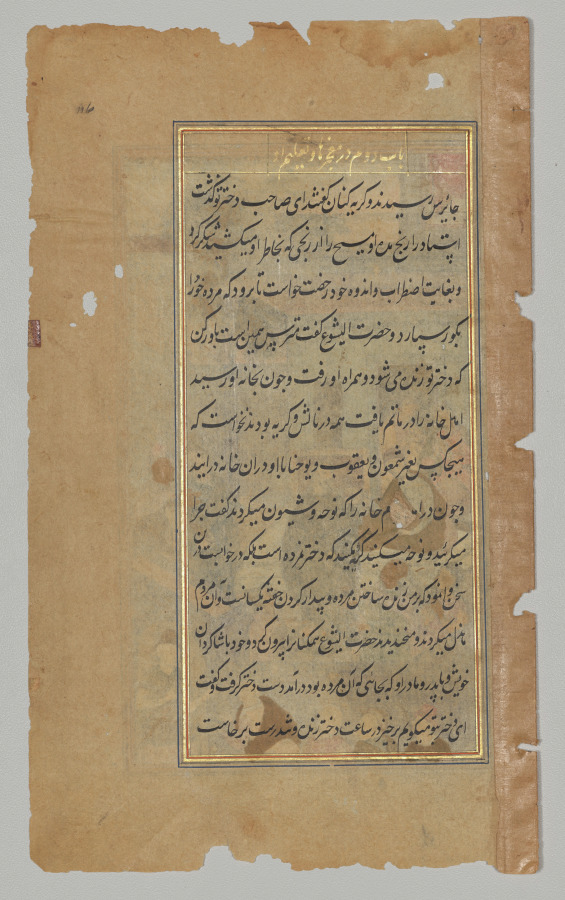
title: Jesus Raises Jairus’s Daughter from the Dead (folio 82 verso), from a Mirror of Holiness (Mir’at al-quds) of Father Jerome Xavier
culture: Mughal India, Allahabad, made for Prince Salim (1569–1627)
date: 1602–4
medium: Gum tempera, ink, color, and gold on paper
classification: Manuscript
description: Jesus gestures toward the 12-year-old girl he has awakened from the dead, in a lesser-known miracle included in Father Jerome’s text. The elder of a synagogue, the girl’s father, named Jairus, had shown great faith in Jesus and had begged him to help his daughter; Jairus may be the figure dressed as a Jesuit in a dark cloak and tall matching cap behind Jesus. Jesus admonished the crowd to tell no one about the miracle, but people turn and gesture to one another, unable to keep from spreading the news.